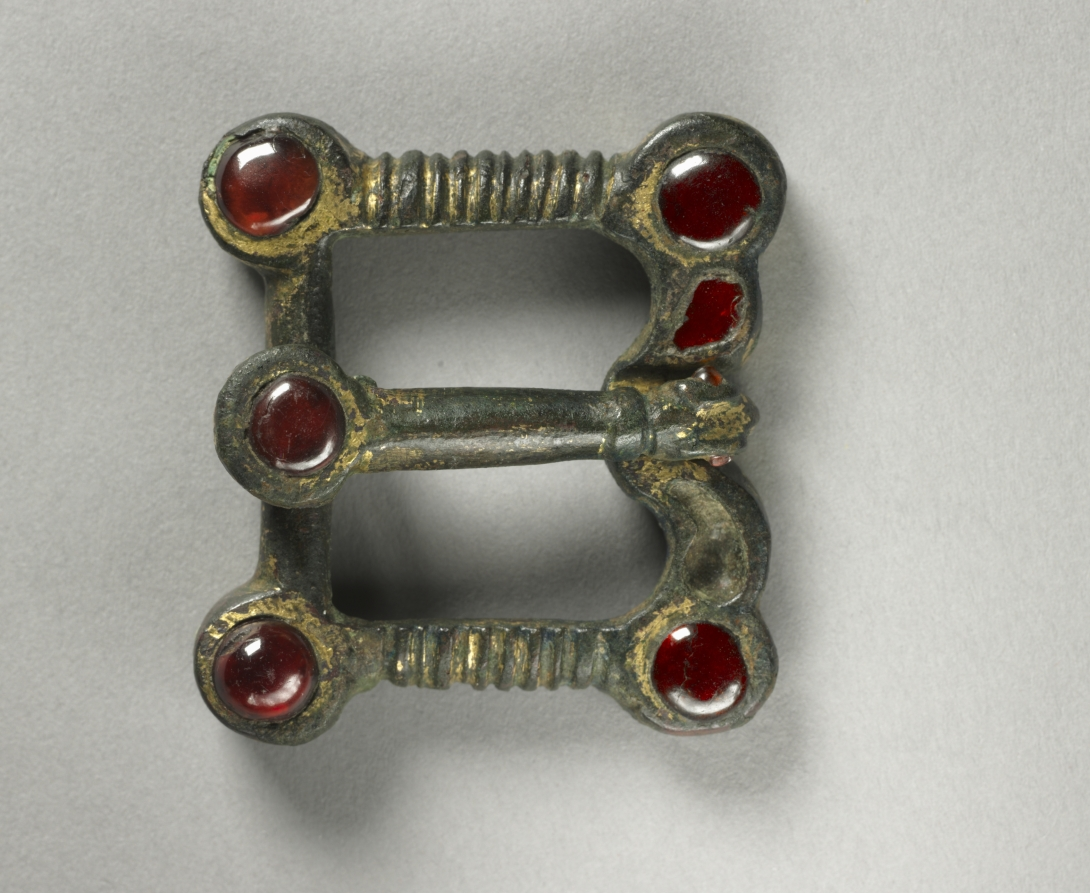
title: Buckle with Animal-Shaped Thorn and Belt Plate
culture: Sarmato-Gothic, Migration period, 5th century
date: 400s CE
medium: bronze with traces of gilding and garnets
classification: Jewelry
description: Between the AD 200s and the 600s, the European West is characterized by the so-called "barbarian invasions," a term referring to the movement of various Germanic people into the Roman Empire. The period of the great migrations of these Germanic peoples was one of uncertainty and disorder. By the AD 300s, the collapse of Roman military power in the western provinces was increased by the westward movement of the Huns, an especially fierce enemy from the east. The Huns drove before them displaced Germanic tribes—the Visigoths, Ostrogoths, and Lombards—as they advanced deep into the western provinces. These Germanic peoples were composed of many national groups with diverse customs and traditions. Long nomadic, they gradually settled and took to farming, though always preferring maritime commerce and fishing. They were not attracted to the monumental arts of architecture and sculpture until they had long settled an area. By contrast, the tombs of these migratory people were filled with weapons, tools, and jewelry, often magnificently decorated. The art of the Germanic peoples is almost exclusively one of personal adornment—a portable art that followed men and women to their graves.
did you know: During this time it was popular to wear gold inlaid with precious stones.